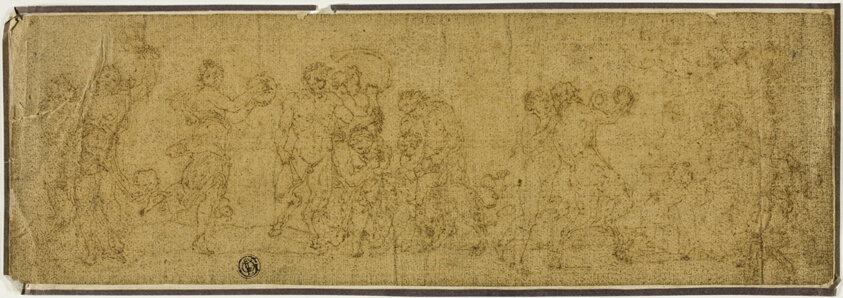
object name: Drawing and Watercolor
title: Bacchanal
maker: Raymond de Lafage (French, 1656-1690)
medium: Pen and brown ink, on tan laid paper, tipped onto tan laid paper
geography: France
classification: pen and ink drawings; drawings (visual works); prints and drawing